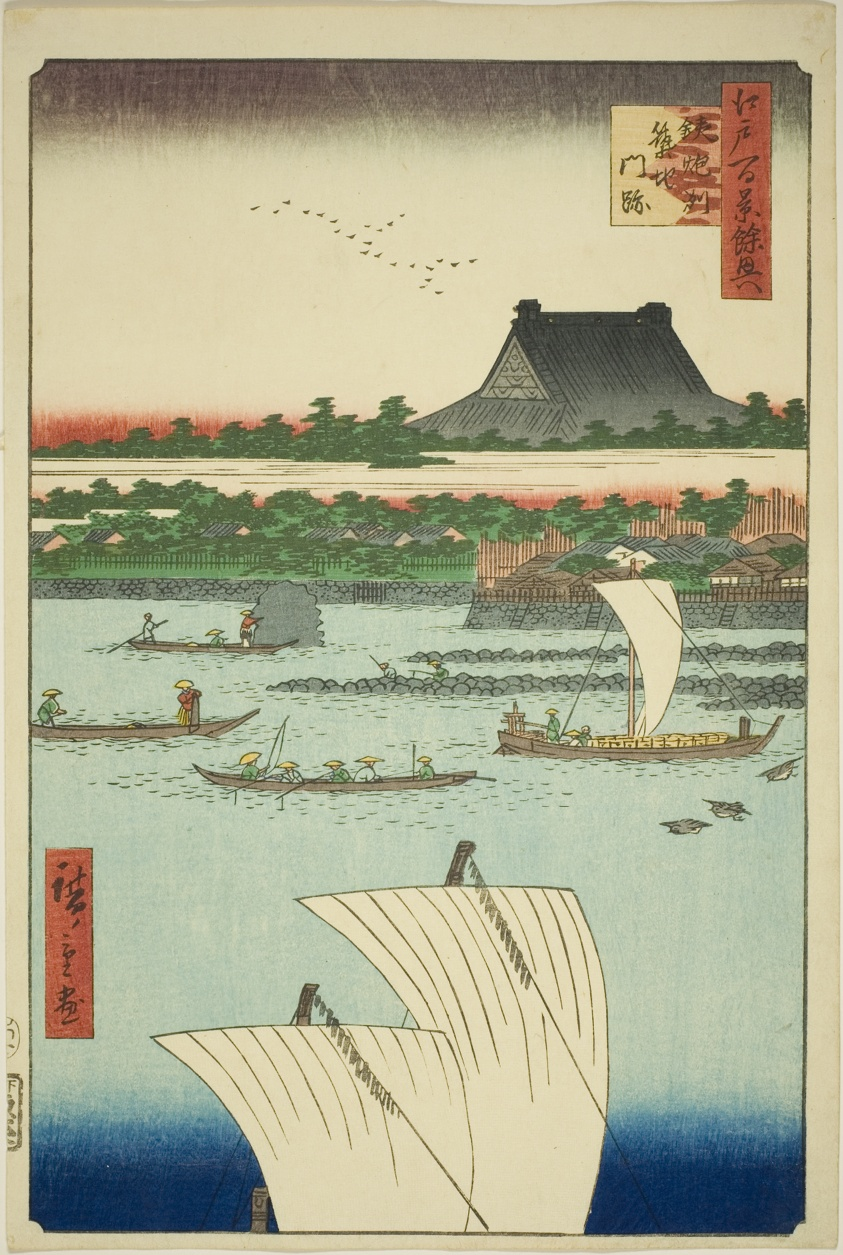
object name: Print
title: Teppozu and Tsukiji Honganji Temple (Teppozu Tsukiji Monzeki), from the series "Supplement to the One Hundred Famous Views of Edo (Edo hyakkei yokyo)"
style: Japanese (culture or style)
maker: Utagawa Hiroshige 歌川 広重; Japanese, 1797-1858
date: 1858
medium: Color woodblock print; oban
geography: Japan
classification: woodblock print; print; asian art